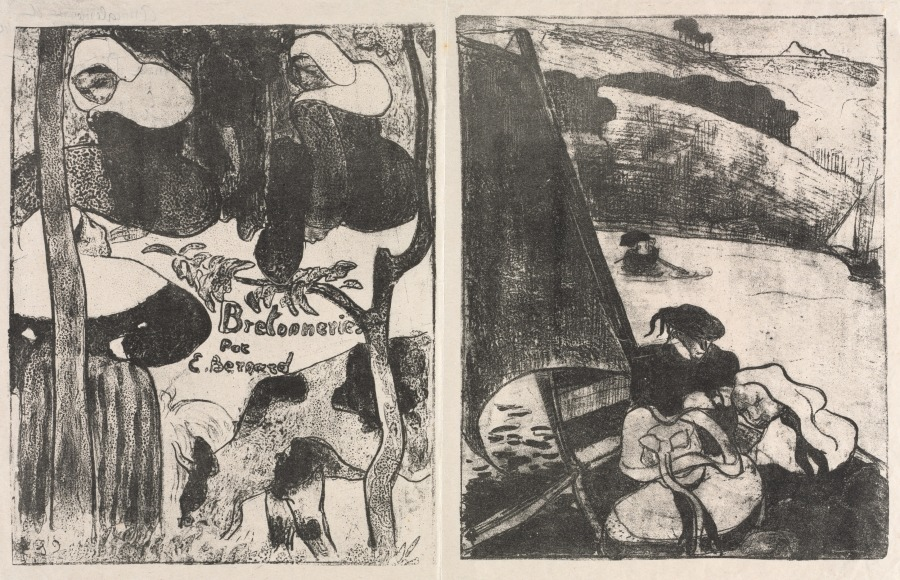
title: Les Bretonneries: Title Page (Page de Titre) and The Return from the Pilgrimage (Le Retour du Pardon)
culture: France, 19th century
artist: Émile Bernard (French, 1868–1941)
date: 1889, printed 1896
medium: zincograph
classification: Print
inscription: inscribed on verso of title page: A Don Ignatio Zuloago/ Amicalement et/ avec Grattitude artistique/ Emile Bernard/ Seville 1897